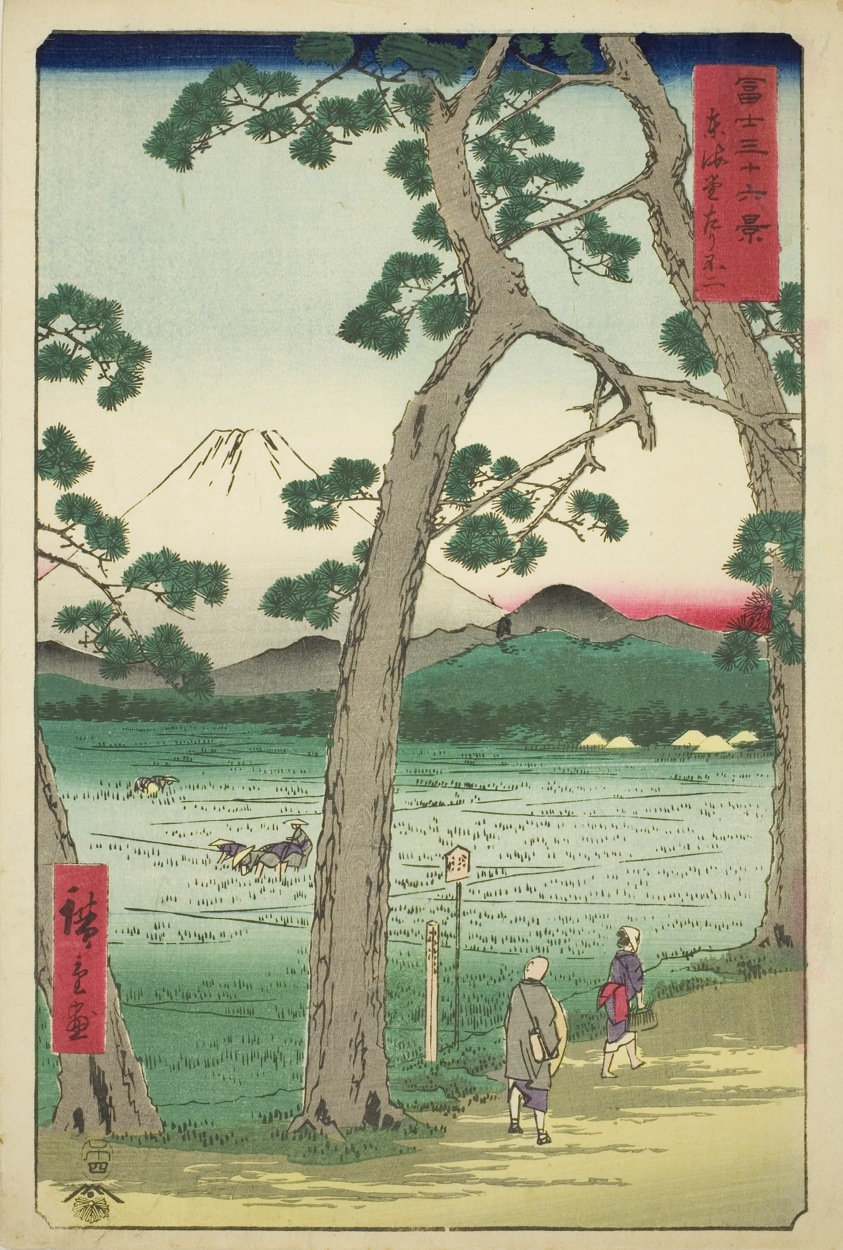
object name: Print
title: Mout Fuji Seen from the Left on the Tokaido (Tokaido hidari Fuji), from the series "Thirty-six Views of Mount Fuji (Fuji sanjurokkei)"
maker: Utagawa Hiroshige 歌川 広重; Japanese, 1797-1858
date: 1858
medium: Color woodblock print; oban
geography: Japan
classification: print; asian art